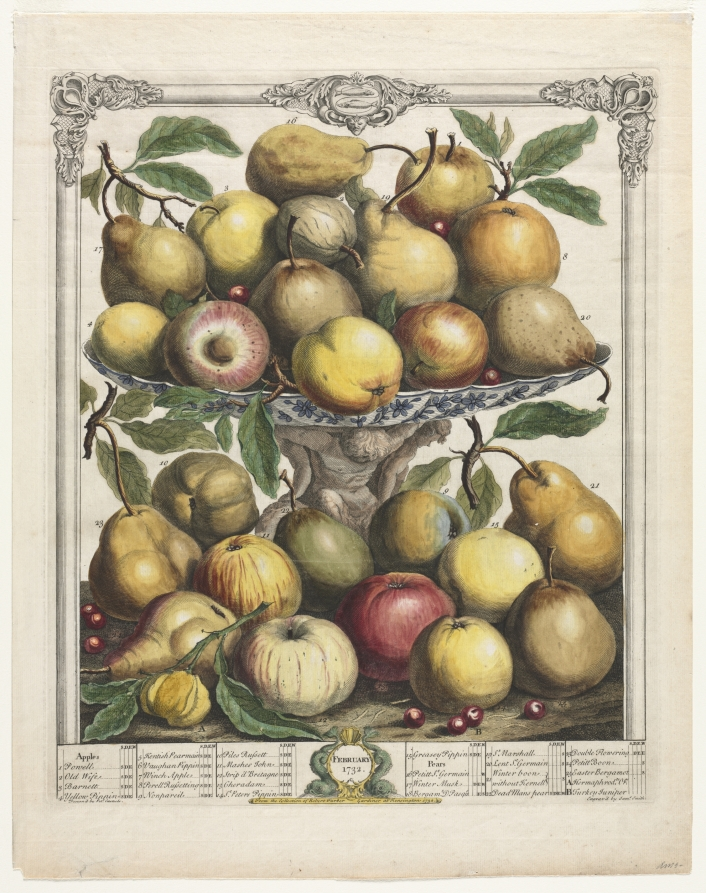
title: Twelve Months of Fruit: February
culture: England, 18th century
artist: Henry Fletcher (British, active 1715–38)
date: 1732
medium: engraving, hand-colored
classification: Print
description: Unlike in books from the previous century, Furber’s etchings were colored by hand with watercolor in a realistic manner. The example to the left, which had not yet been painted, demonstrates the conceptual importance of color. Watercolor enhances the three-dimensional effect of each fruit and adds significant visual interest. Although these prints fulfilled a utilitarian purpose, their decorative quality was also appreciated: they were reissued in numerous editions from the 1730s through the 1750s.